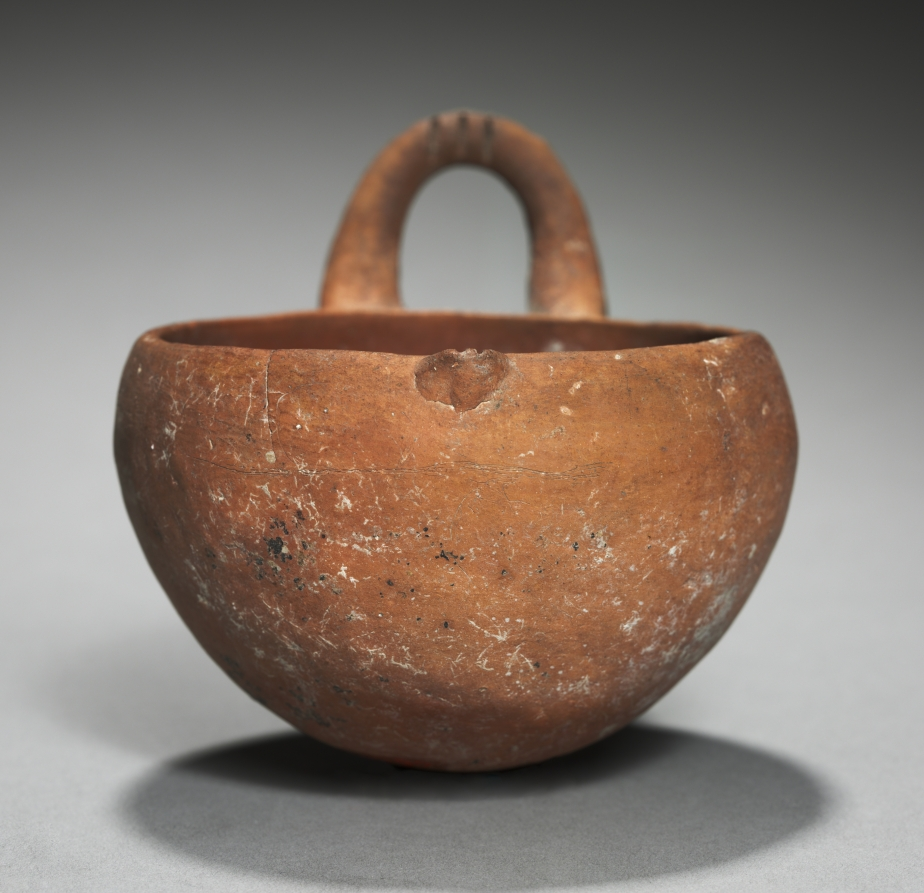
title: One-Handled Bowl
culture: Cyprus, early Cypriot III-middle Cypriot II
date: c. 2000–1725 BCE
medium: red ware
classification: Ceramic